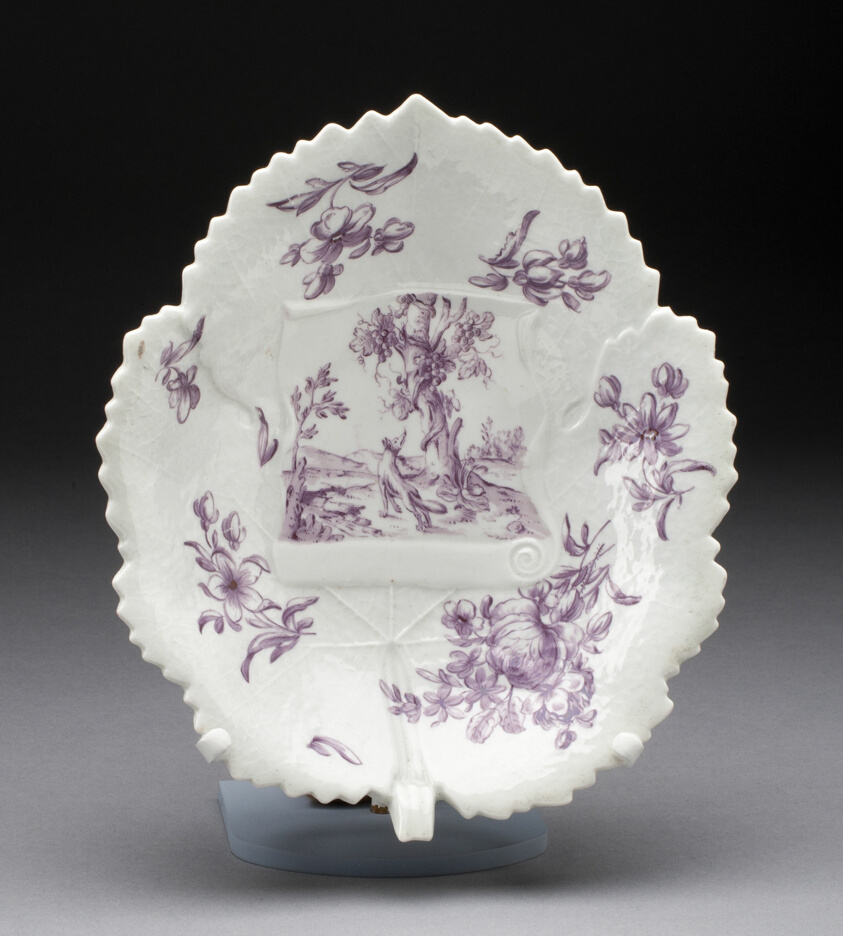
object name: Ceramics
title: Dish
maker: Worcester Porcelain Factory (Warmstry House Period, 1751–1783); Worcester, England, founded 1751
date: c. 1760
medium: Soft-paste porcelain with purple monochrome enamel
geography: Worcester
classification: dish (vessel); tableware; porcelain; european decorative arts; ceramics